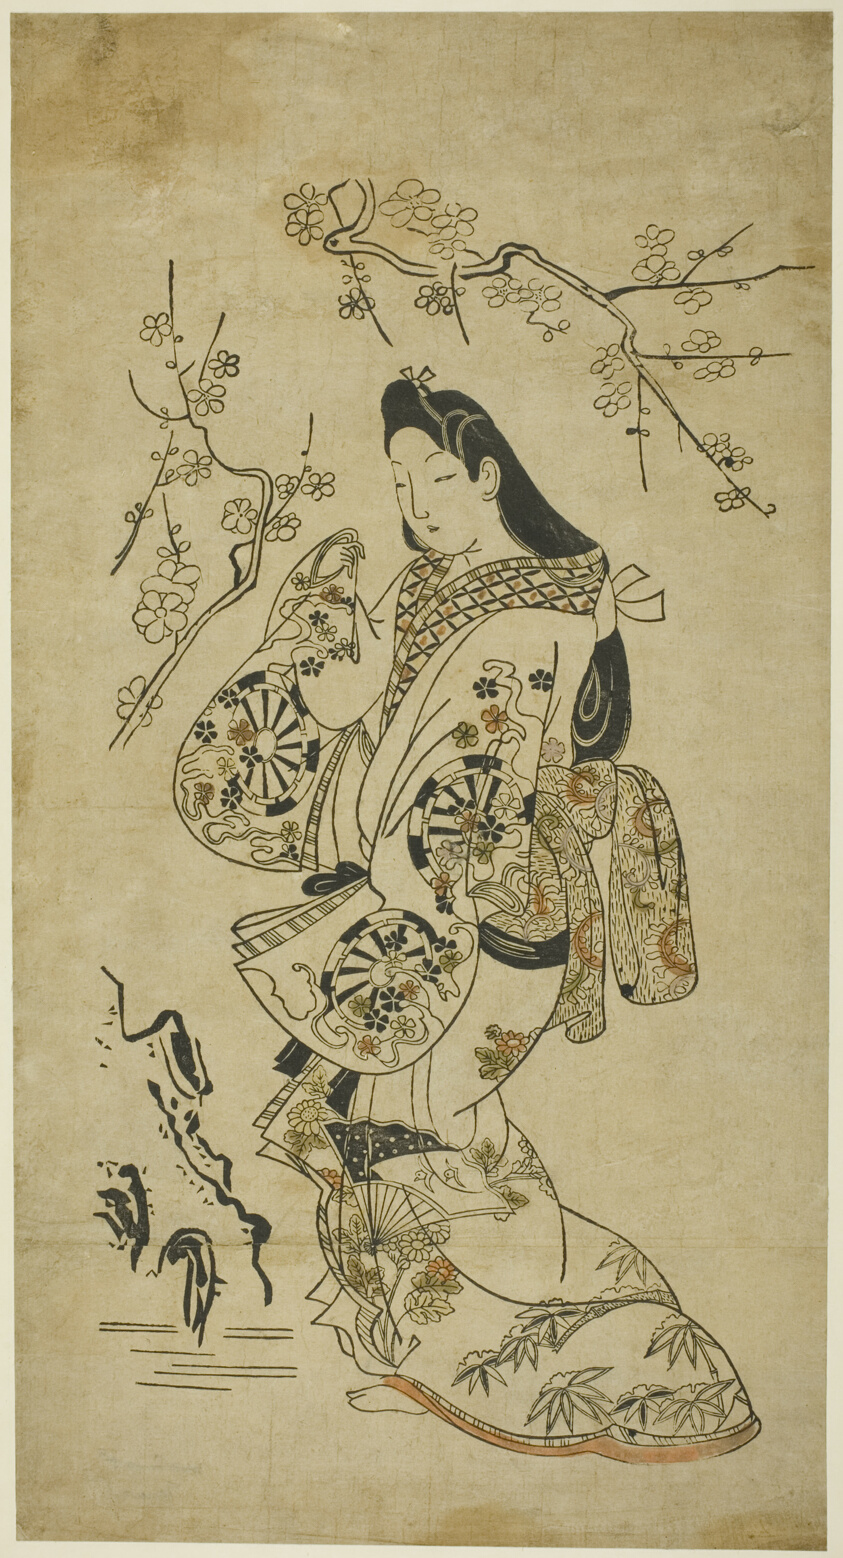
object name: Print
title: A Young Woman Walking near a Plum Tree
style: Japanese (culture or style)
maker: Artist unknown; Japanese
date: c. 1688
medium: Hand-colored woodblock print; o-oban, tan-e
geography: Japan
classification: woodblock print; print; asian art